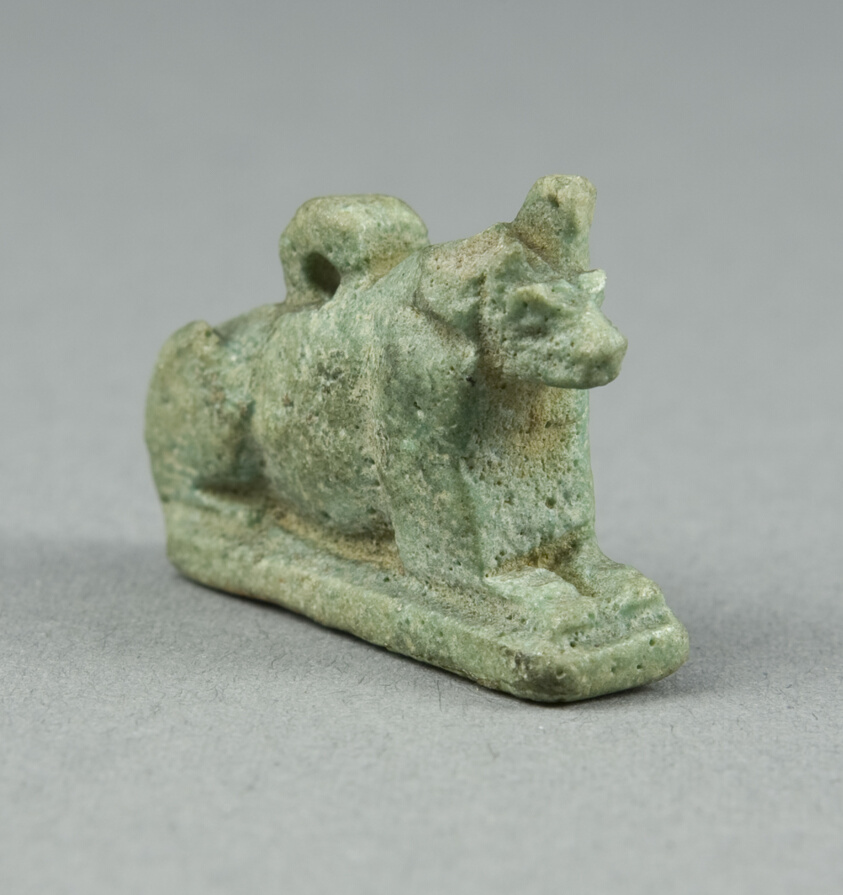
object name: Costume and Accessories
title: Amulet of the God Anubis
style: egyptian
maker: Egyptian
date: Late Period–Ptolemaic Period (?) (7th–1st centuries BCE)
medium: Faience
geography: Egypt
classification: amulet; jewelry; ceramics; ancient art; costume; faïence (composite material)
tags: gods (deities)